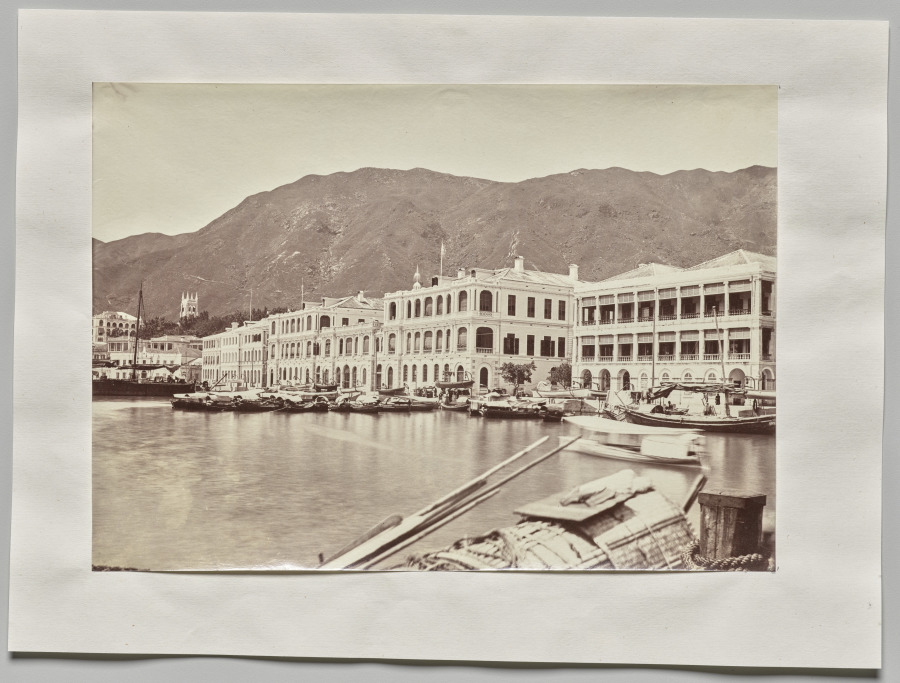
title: Untitled (View on the Praya, looking east, Hong Kong)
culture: England, 19th century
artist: William Pryor Floyd (British, 1834–c. 1900)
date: 1866–73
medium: albumen print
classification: Photograph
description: Floyd’s views of Hong Kong possess a clarity of organization and elegance lacking in most of his competitors’ photographs. The row of white, Western-style commercial buildings divides the composition horizontally into thirds. In the foreground are water and a single Chinese boat that leads the eye to the closest building. The crisp cubic forms of the buildings stand out against the uniformly dark hillside that serves as their backdrop.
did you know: Praya, a term used in colonial Hong Kong for the road by the waterfront, came from the Portuguese word praia, which means "beach."